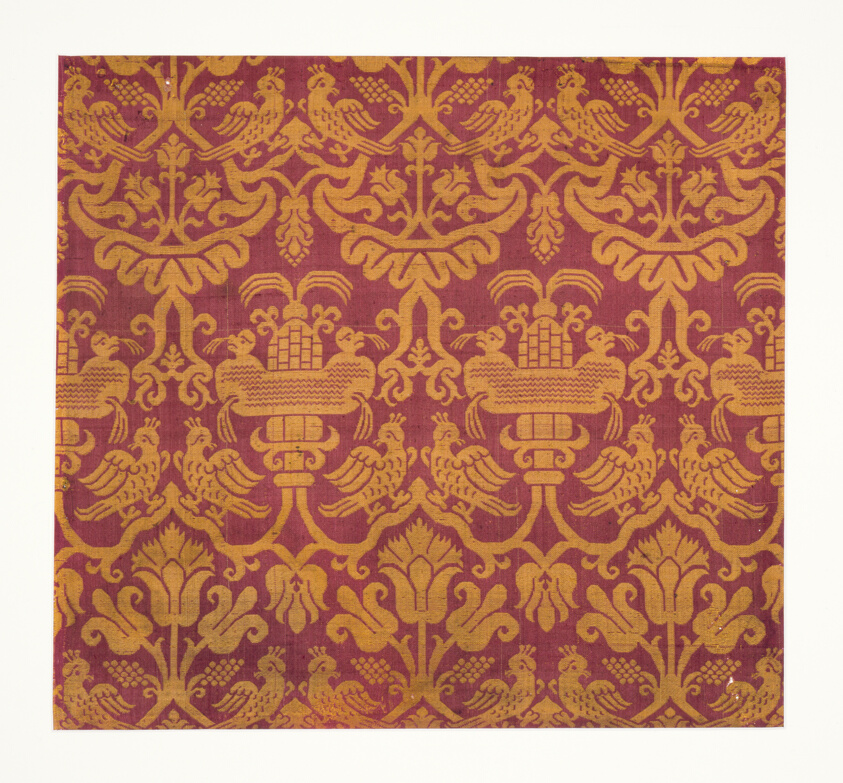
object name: Textile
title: Fragment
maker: Spain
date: 17th century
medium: Silk, plain weave with plain interlacings of secondary binding warps and patterning wefts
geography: Spain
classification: textile; weaving